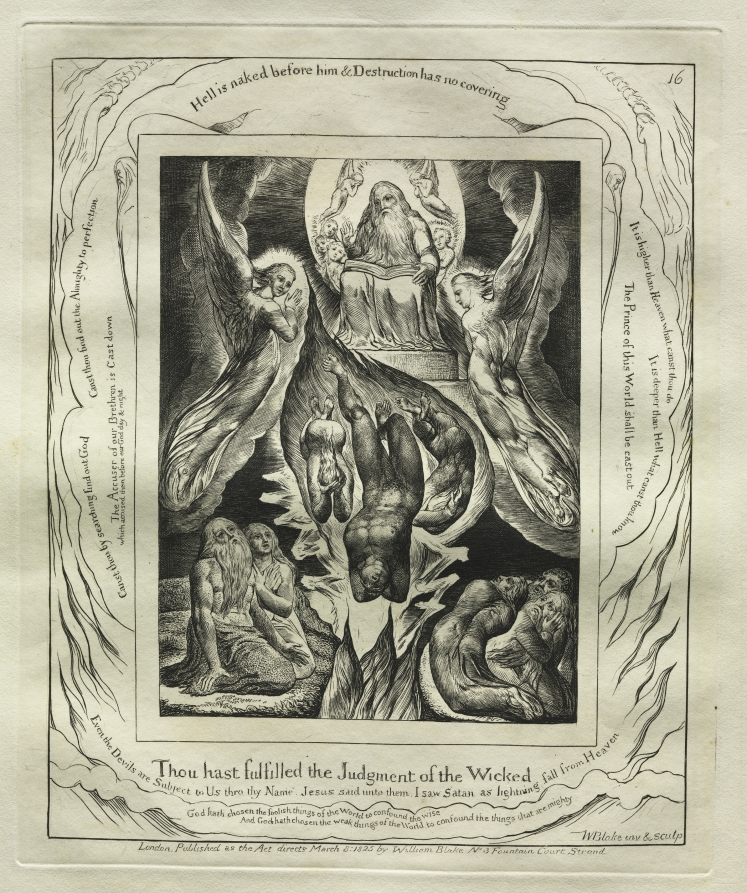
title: The Book of Job: Pl. 16, Thou hast fulfilled the Judgment of the Wicked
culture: England, 19th century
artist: William Blake (British, 1757–1827)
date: 1825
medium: engraving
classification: Print